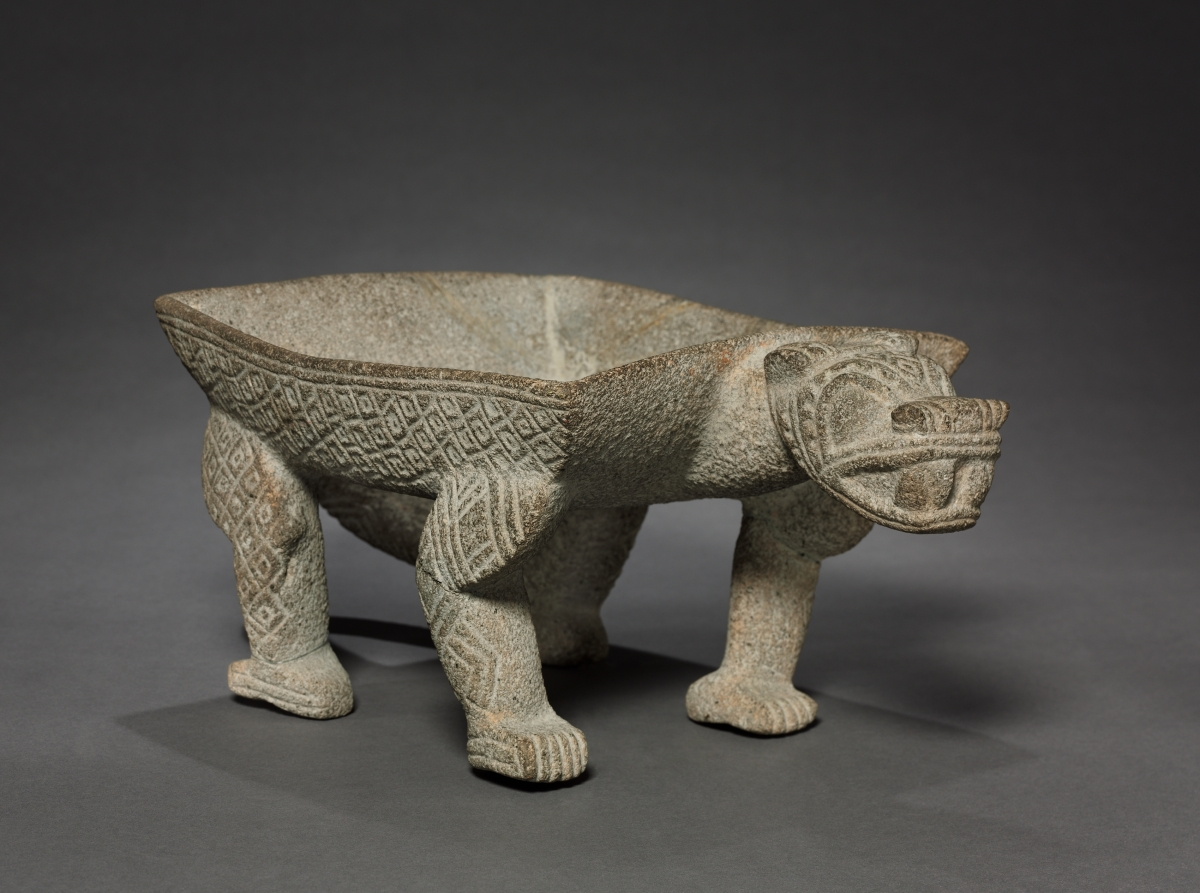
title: Jaguar Grinding Stone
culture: Costa Rica, Atlantic Watershed region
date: c. 1000–1550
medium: stone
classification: Sculpture